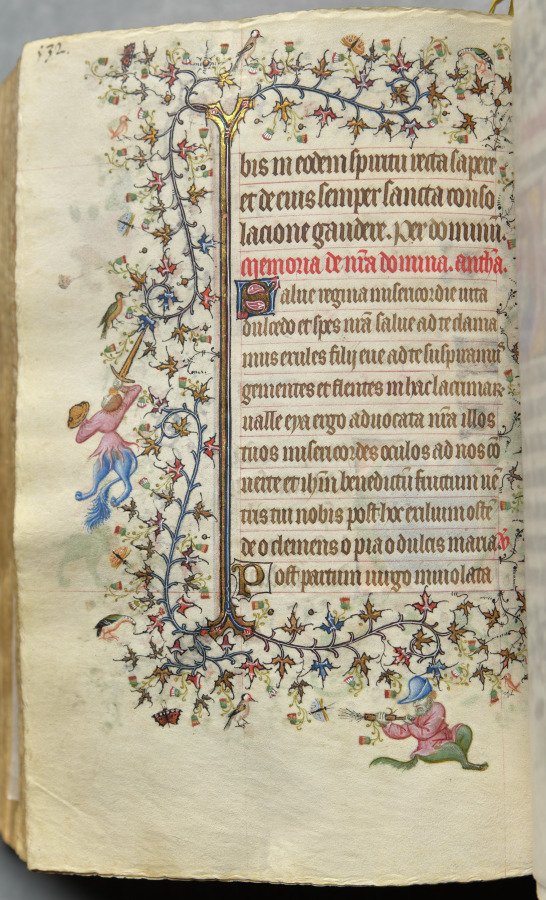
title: Hours of Charles the Noble, King of Navarre (1361-1425): fol. 260v, Text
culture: France, Paris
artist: Master of the Brussels Initials and Associates (French)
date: c. 1405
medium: ink, tempera, and gold on vellum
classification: Bound Volume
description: This precious volume was obviously highly prized by its owner, the French-born King of Navarre, who had his coat of arms painted on no less than twenty folios. Rather than directly commissioning this manuscript from a specific workshop, it seems that Charles the Noble acquired his book of hours -- perhaps ready-made for the luxury market -- while on a trip to Paris in 1404-05. A collaborative effort, six painting styles are evidenced within the pages of this codex, those of two Italians, two Frenchmen, and two Netherlanders. The painter who was responsible for the planning and decoration of the book, and who produced seventeen of the large miniatures, was a Bolognese artist known as the Master of the Brussels Initials. His principal assistant, responsible for most of the borders, was a Florentine who signed his name "Zecho" da Firenze on folio 208 verso.